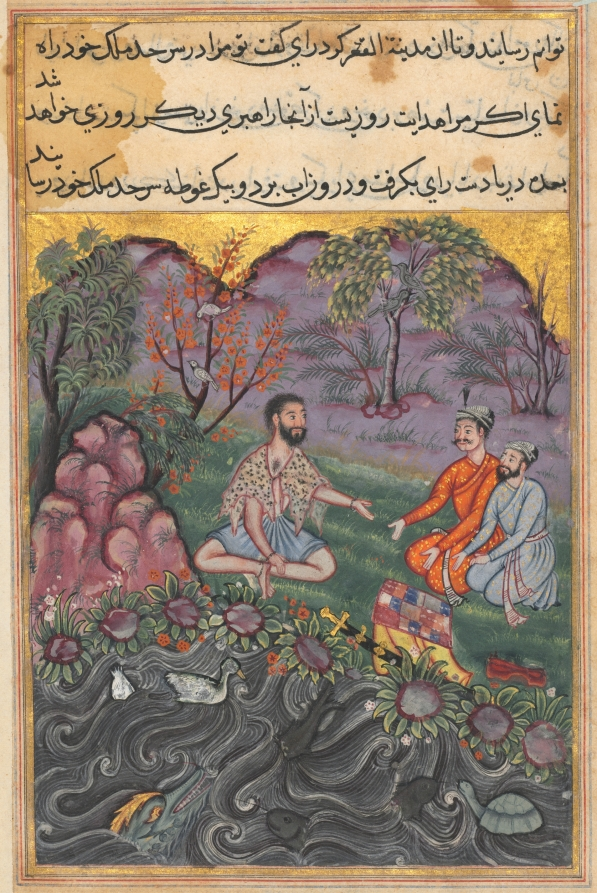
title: The Raja of Ujjain, who is traveling in the guise of a yogi, meets two brothers who ask him to equitably partition their father’s possession, from a Tuti-nama (Tales of a Parrot): Forty-sixth Night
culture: Mughal India, court of Akbar (reigned 1556–1605)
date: c. 1560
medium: gum tempera, ink, and gold on paper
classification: Painting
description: The raja, wearing a leopard print cape around his shoulders, sits with the brothers at the edge of a pool. Four magical objects, a cloak, a blanket, shoes, and a sword, lie on the ground between them. Under the pretense of dividing the goods, the raja distracts the brothers and steals their inheritance.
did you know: Ducks, fish, a turtle, and a crocodile swim in the waters of the pool.